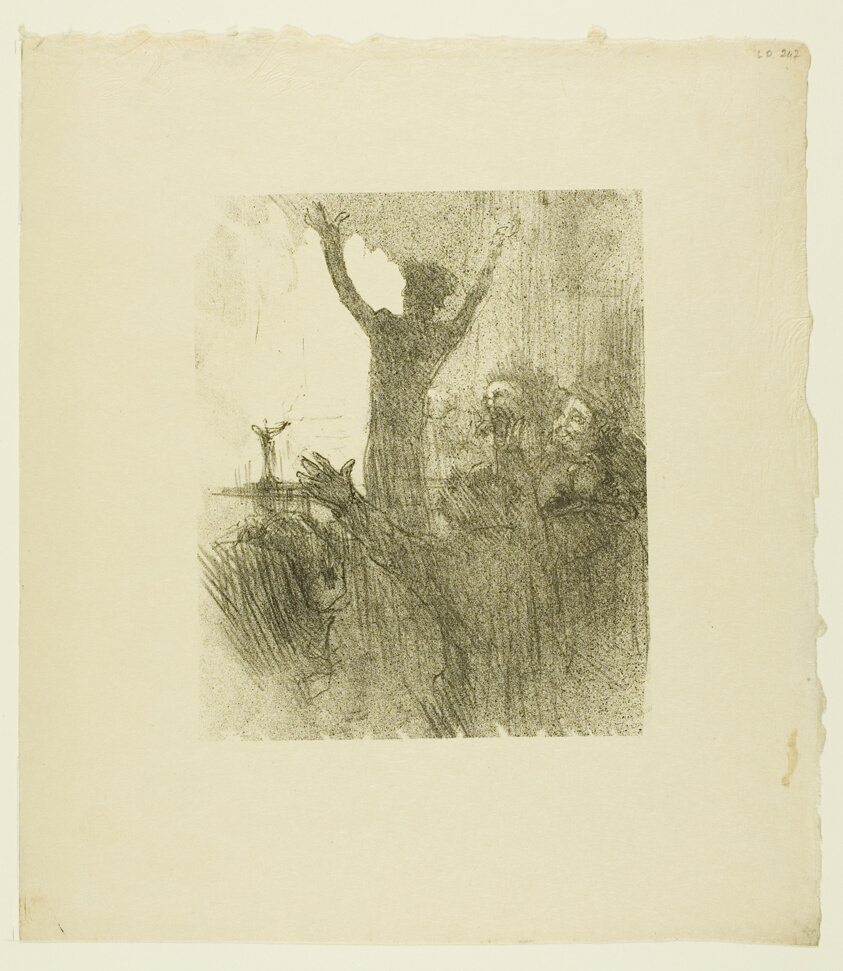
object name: Print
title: Schlomé Fuss in the Synagogue, from Au Pied du Sinaï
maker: Henri de Toulouse-Lautrec (French, 1864-1901)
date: 1897, published 1898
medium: Lithograph on cream wove paper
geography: France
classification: lithograph; print; prints and drawing